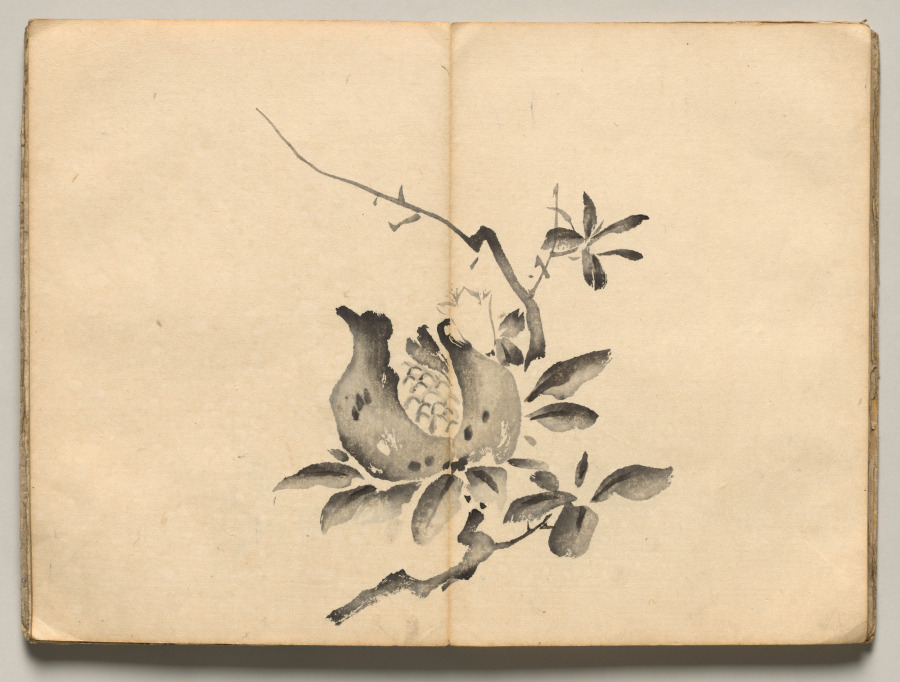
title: Pomegranate from Ōkyo Picture Book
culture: Japan, Edo period (1615–1868)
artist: after Maruyama Ōkyo (Japanese, 1733–1795)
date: 1850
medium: accordion-style woodblock printed folding-book; ink and color on paper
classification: Bound Volume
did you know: This impression of a book of woodblock-printed designs is missing a spread that depicts a crane.